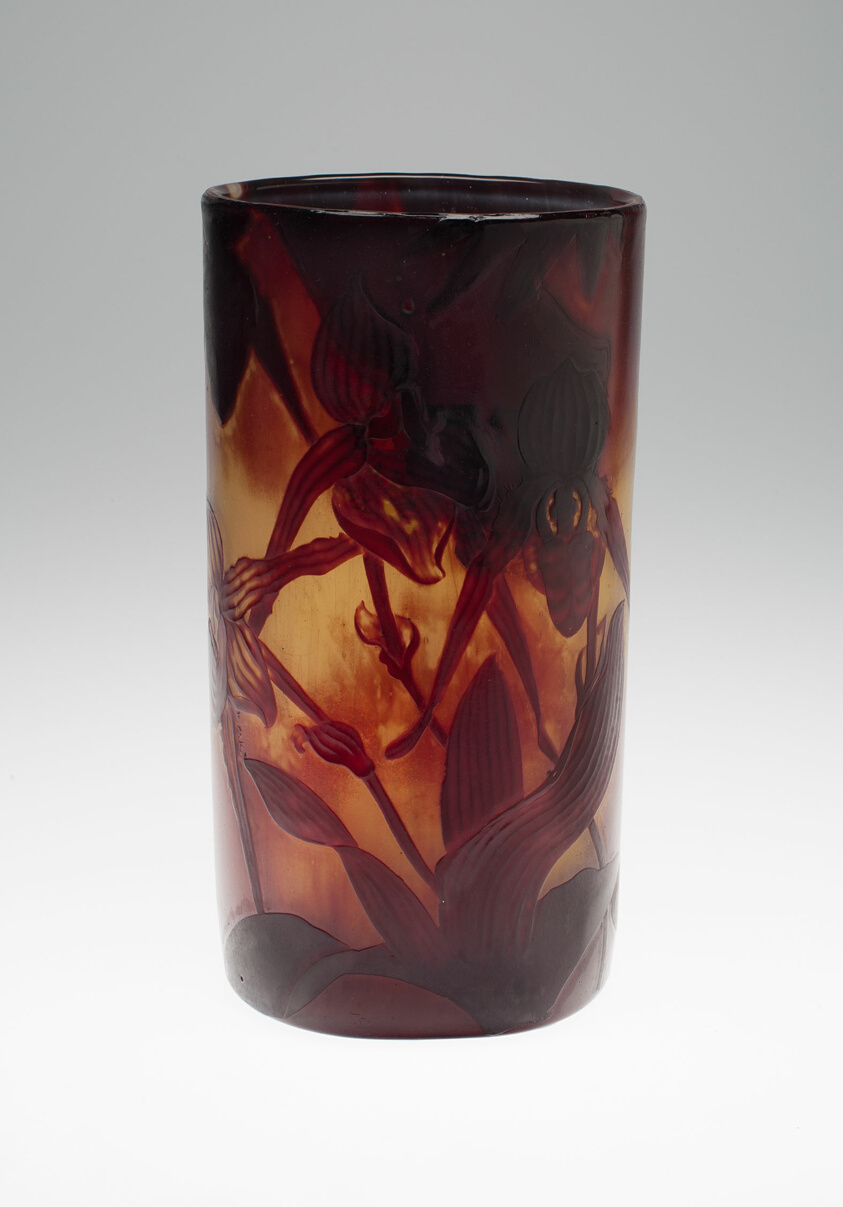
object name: Glass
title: Vase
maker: France, Nancy; Émile Gallé (French, 1846-1904)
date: c. 1900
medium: Glass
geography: France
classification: vase; glass; vessel; european decorative arts